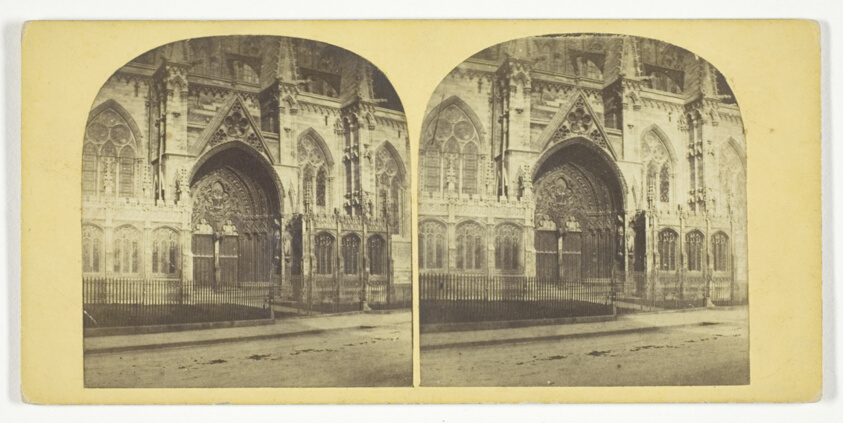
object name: Photograph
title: Lincoln Cathedral, South Porch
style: 19th century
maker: W. Woodward (English, active mid-19th century)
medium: Albumen print, stereo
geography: England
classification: stereograph (albumen); albumen silver print; photographic process; photography; photograph